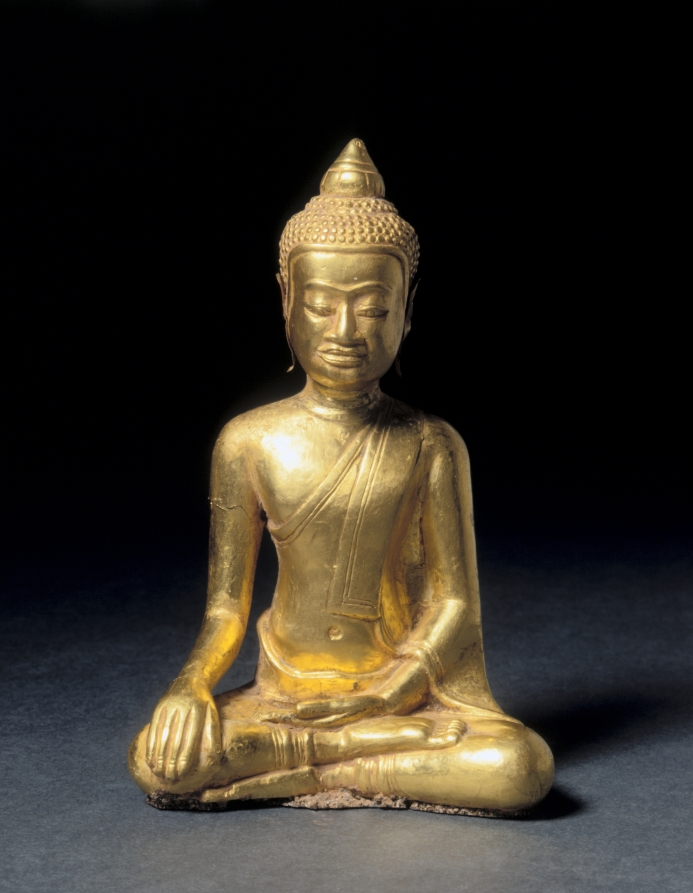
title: Seated Buddha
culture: Thailand, Ayutthaya, Wat Ratchaburana, 14th century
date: before 1424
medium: gold with resin core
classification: Sculpture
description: This pristinely modeled Buddha was fashioned from a sheet of 24-karat gold, using the repoussé (hammering) technique. The figure is filled inside with a resin core. The style is typical of the last phase of Khmer art (800s–1400s), the Lapburi style, which combines characteristics of both Cambodian and Thai sculptural styles.